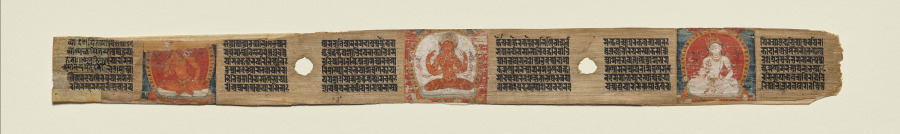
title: Prajnaparamita flanked by two bodhisattvas, folio 187 (recto), from a Manuscript of the Perfection of Wisdom in Eight Thousand Lines (Ashtasahasrika Prajnaparamita-sutra)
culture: Eastern India, Bihar, Vikramashila Monastery. Painting: Nepal, Kathmandu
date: Sunday, September 14, 1119 (year 239 of the Newar Samvat in the month of Ashvina)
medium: Gum tempera and ink on palm leaf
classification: Painting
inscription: [pravartayita]vyā deśayitavyopadeṣṭavyoddeṣṭavyā svādhyātavyā likhitavyā / tathāgatādhiṣṭhānena mahāpustake pravyaktapravyaktairakṣaraiḥ sulikhitāṃ kṛtvā satkartavyā gurukartavyā mānayitavyā pūjayitavyā arcayitavyā apacāyitavyā puṣpairdhūpairgandhairmālyairvilepanaiścūrṇaiścīvarairvādyairvastraiśchatrairdhvajairghaṇṭābhiḥ patākābhiḥ, samantācca dīpamālābhiḥ, bahuvidhābhiś ca pūjābhiḥ / iyamasmākamantikādānanda anuśāsanī / tatkasya hetoḥ? atra hi prajñāpāramitāyāṃ sarvajñajñānapariniṣpattirbhaviṣyati / tatkiṃ manyase ānanda śāstā te tathāgataḥ? ānanda āha - śāstā me bhagavan, śāstā me sugata / evamukte bhagavānāyuṣmantamānandametadavocat - śāstā te ānanda tathāgataḥ / paricarito 'smyānanda tvayā maitreṇa kāyakarmaṇā manaāpena, maitreṇa vākkarmaṇā manaāpena, maitreṇa manaḥkarmaṇā manaāpena / tasmāttarhi ānanda yathaiva tvayā mamaitarhi tiṣṭhato dhriyamāṇasya yāpayato 'smin samucchraye prema ca prasādaś ca gauravaṃ ca kṛtam, tathaiva tvayā ānanda mamātyayādasyāṃ prajñāpāramitāyāṃ kartavyam / dvir api trir api te ānanda parīndāmi anuparīndāmi enāṃ prajñāpāramitām, yatheyaṃ nāntardhīyeta, yathā nāsyāṃ tvamanyaḥ puruṣaḥ syāḥ / yāvadānanda iyaṃ prajñāpāramitā loke pracariṣyati, tāvattathāgatastiṣṭha[tīti]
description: In the center of the page is a seated goddess of wisdom, named Prajnaparamita, who personifies the content of the text itself. A red and white bodhisattva also attend her on either side. This manuscript, consisting of 188 double-sided folios, was calligraphed by a scribe at a monastery in northeastern India, commissioned by a monk from Nepal. Judging from the style of the paintings, they are the work of Nepalese artists.